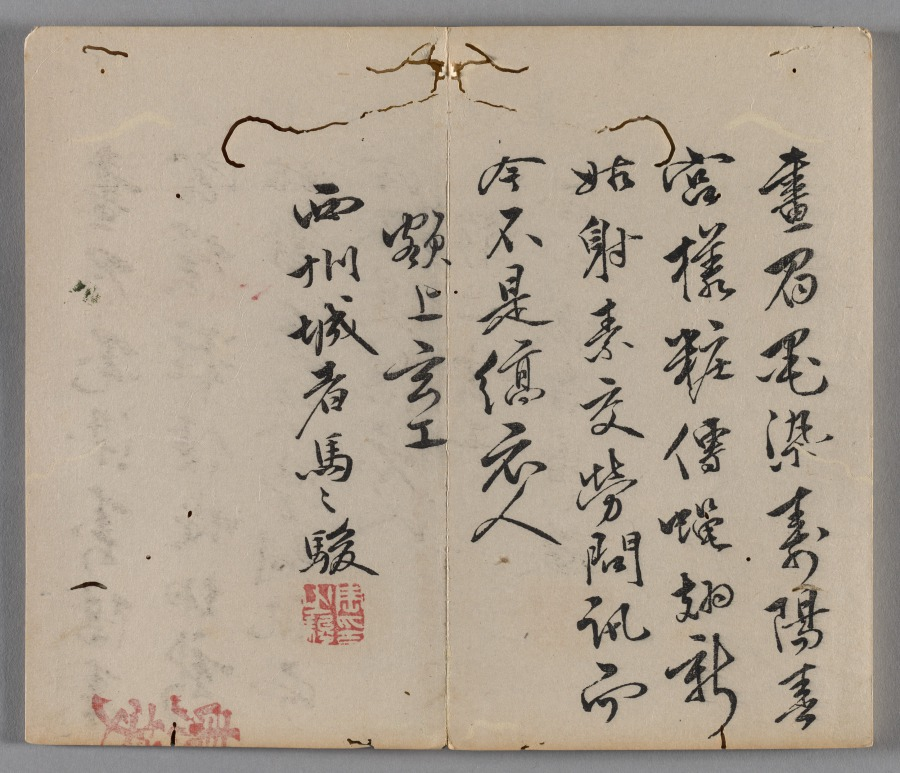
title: Ten Bamboo Studio Painting and Calligraphy Handbook (Shizhuzhai shuhua pu): Plum Blossoms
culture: China, Qing dynasty (1644-1911)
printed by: Hu Zhengyan (Chinese, c. 1584–1674)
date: 1633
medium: Woodblock-printed book; ink and colors on paper; first edition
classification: Print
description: Color printing reached a level of perfection in the early 1600s, as seen in this Ten Bamboo Studio Collection of Calligraphy and Painting and the Mustard Seed Garden Manual of Painting (printed 1679 and 1701). The painterly quality, precision in registering (aligning) the woodblocks, and harmonious colors made them the most successful color print editions in Chinese history. Both editions were printed and compiled in Nanjing, spread nationwide, and had a great impact on the arts in Japan and Korea.